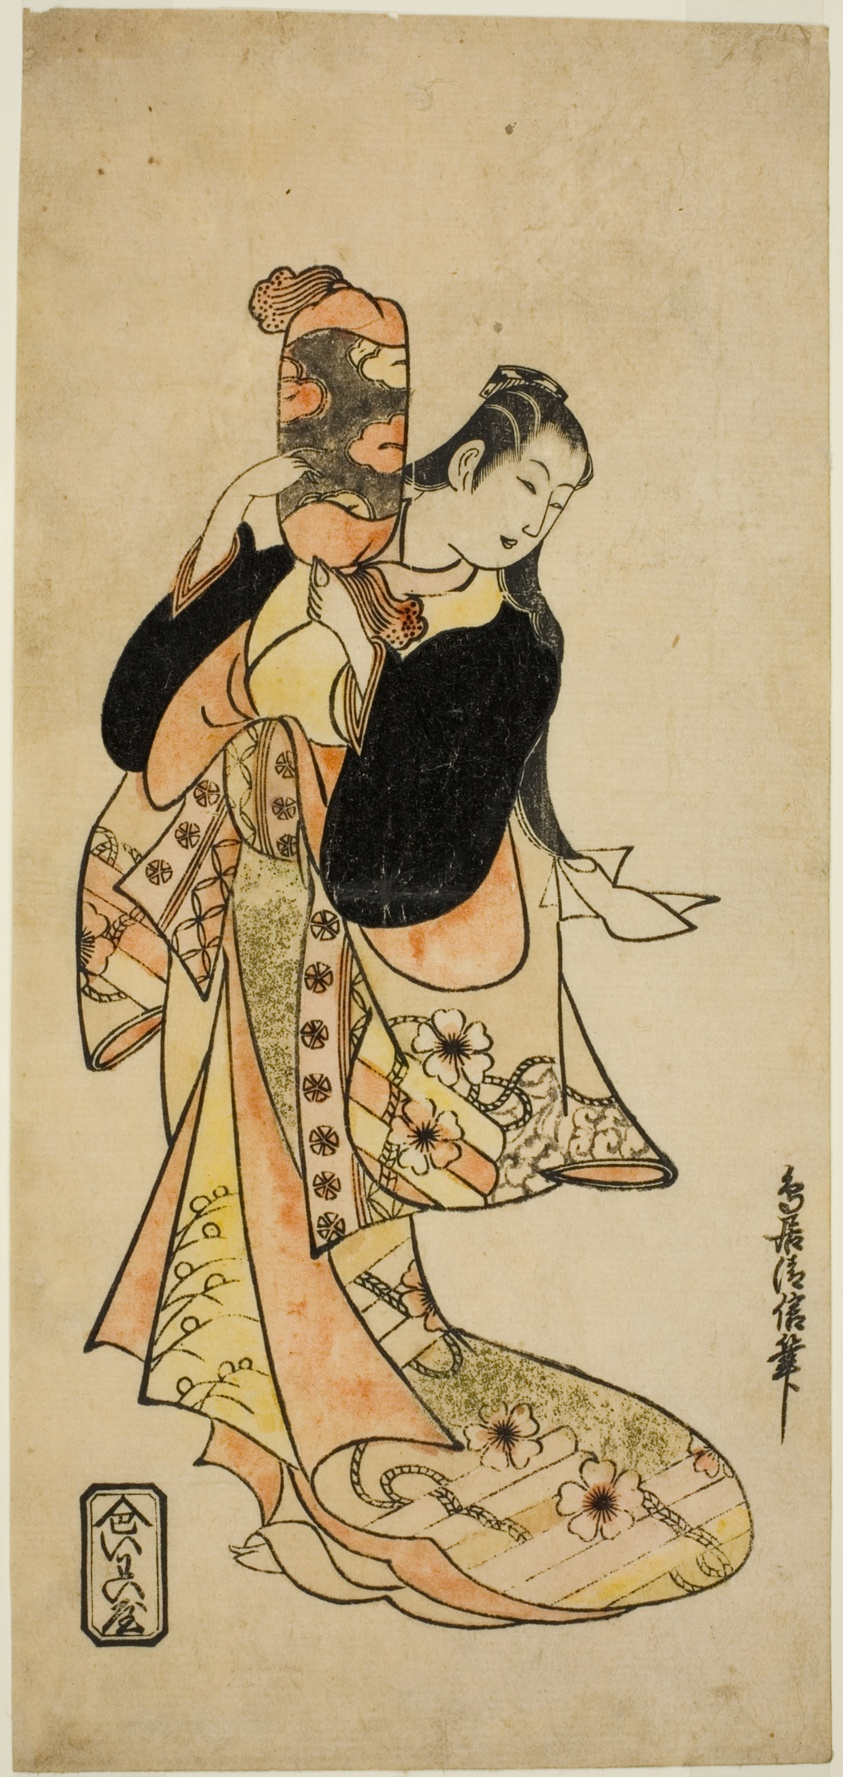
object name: Print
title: The Actor Ichikawa Monnosuke I as Oiso no Tora in the play "Nigiwai Suehiro Soga," performed at the Morita Theater in the first month, 1721 (?)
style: Japanese (culture or style)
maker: Torii Kiyonobu I (Japanese, 1664-1729)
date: c. 1721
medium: Hand-colored woodblock print; hosoban, urushi-e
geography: Japan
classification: print; asian art